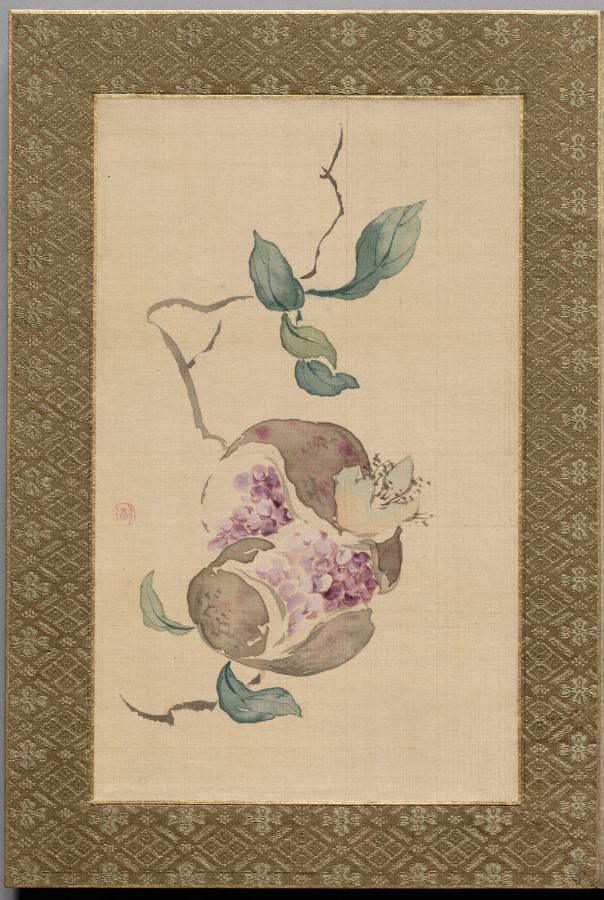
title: Painting from Flowers and Grasses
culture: Japan, Edo period (1615–1868)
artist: Tsubaki Chinzan (Japanese, 1801–1854)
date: 1841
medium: album; ink and color on silk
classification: Painting